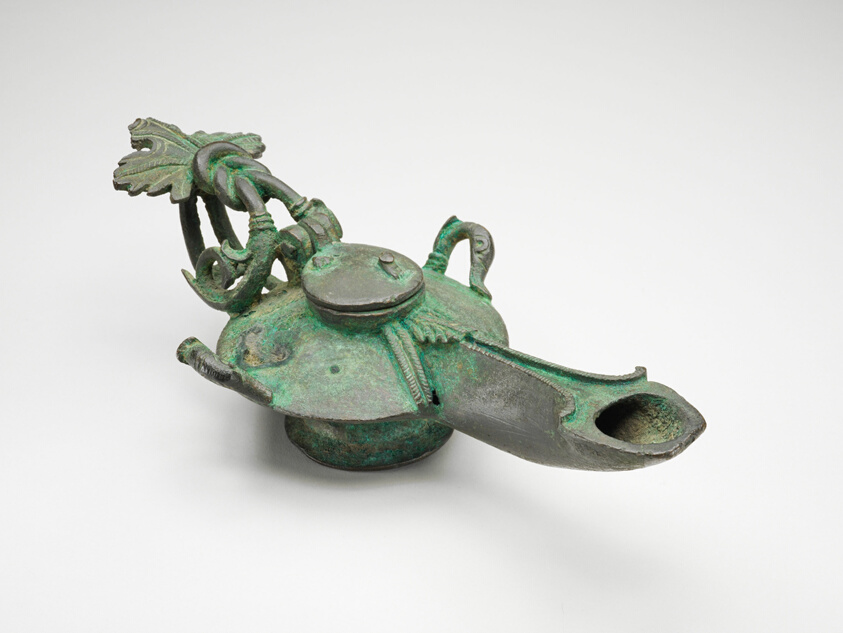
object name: Decorative Arts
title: Roman Oil Lamp Found in Sri Lanka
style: roman (ancient, style or period)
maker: Ancient Roman Empire (found in Sri Lanka)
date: c. 1st/2nd century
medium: Bronze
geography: Sri Lanka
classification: lamp (lighting device); bronze; metal; sculpture; asian art; decorative arts; decorative object/ornament; functional object